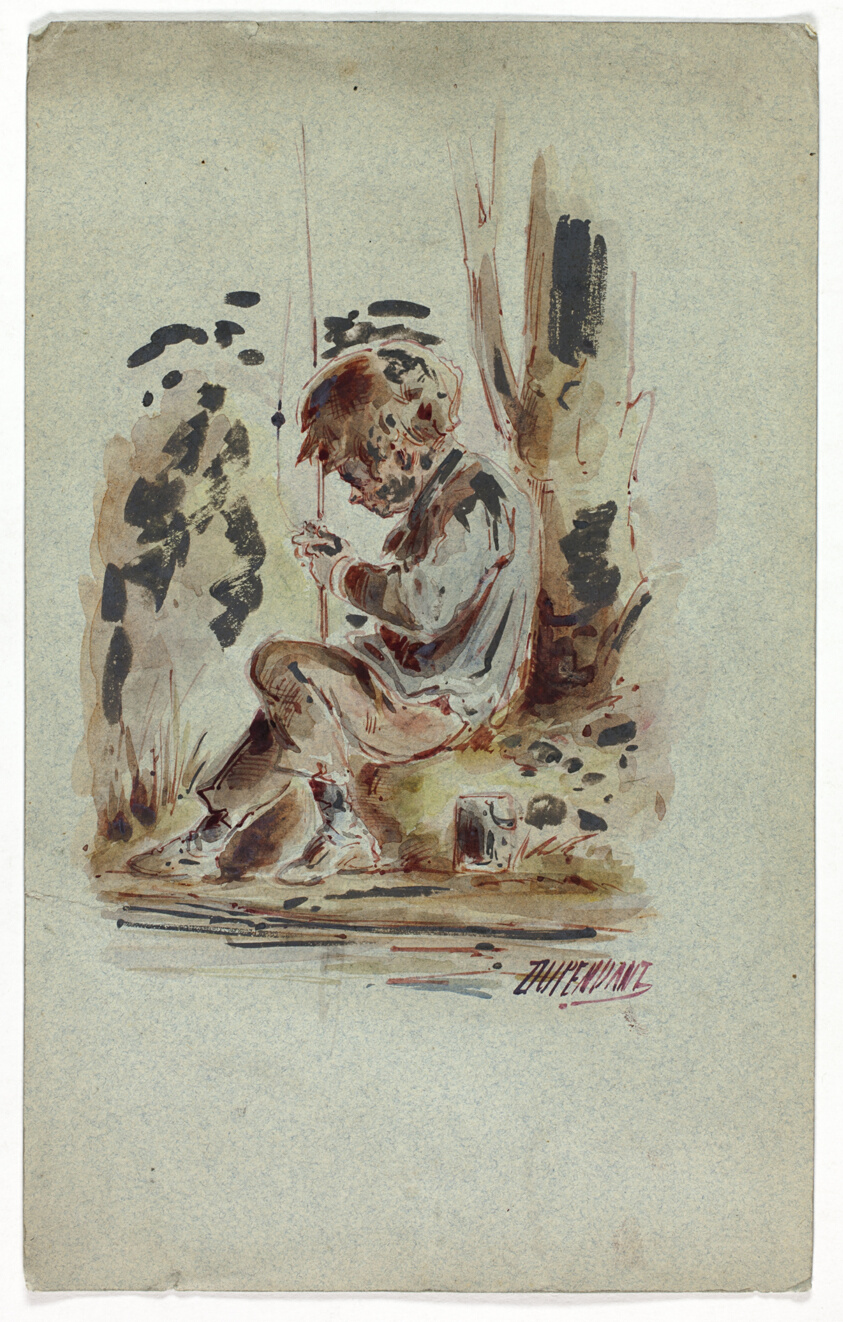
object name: Drawing and Watercolor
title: Boy Fishing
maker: Dupenvant; French, 19th century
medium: Pen and red ink and watercolor, over traces of graphite, on board faced with green wove paper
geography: France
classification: watercolor; drawings (visual works); prints and drawing